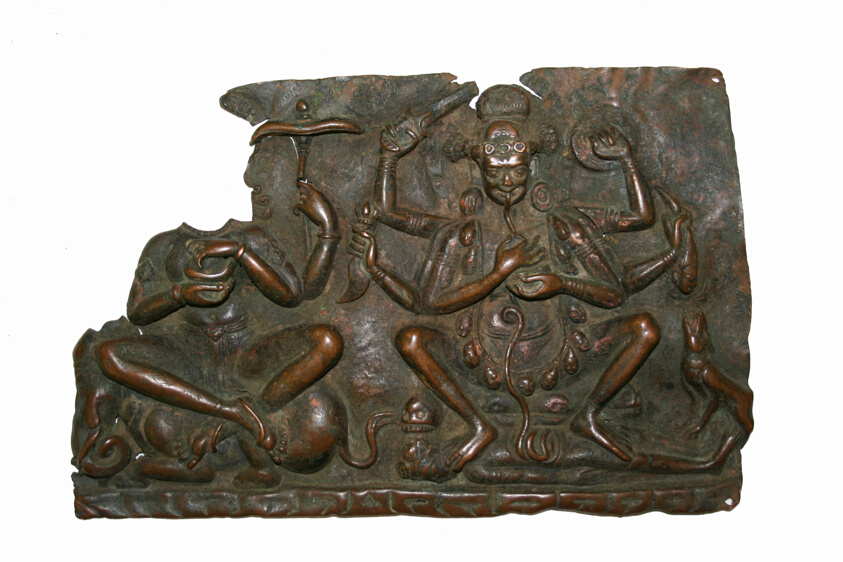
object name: Sculpture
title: Fragment of a Plaque with Seated Mother Goddesses Indrani and Chamunda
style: Himalayan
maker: Nepal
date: c. 10th/11th century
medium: Copper repoussé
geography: Nepal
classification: copper; metal; sculpture; asian art